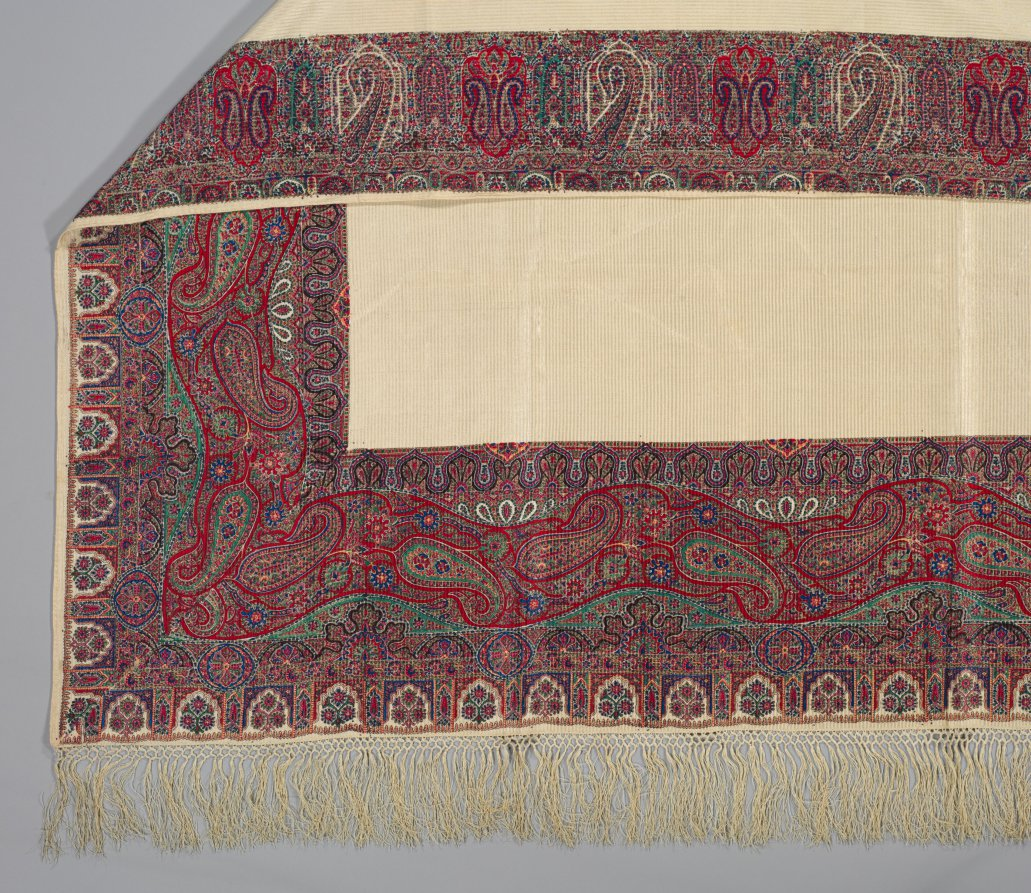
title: Printed Silk Turnover Shawl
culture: France, 19th century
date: 1835–1840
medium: silk; woven and printed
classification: Textile